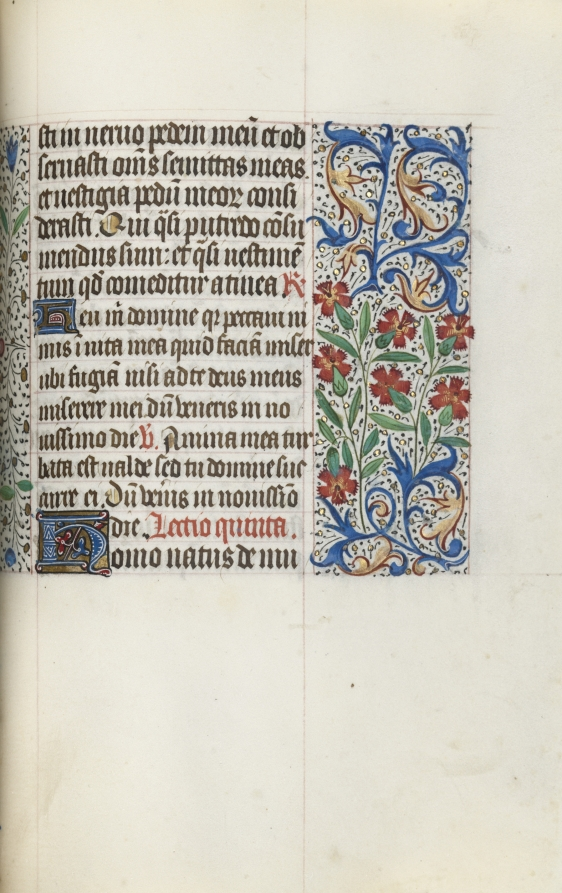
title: Book of Hours (Use of Rouen): fol. 123r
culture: France, Rouen, 15th century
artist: Master of the Geneva Latini (French, active Rouen, 1460–80)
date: c. 1470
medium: ink, tempera, and gold on vellum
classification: Bound Volume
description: In the late 1400s and early 1500s Rouen was an established and important center of book production. The city’s cathedral had a wealthy chapter that spent large sums of money to commission books and to maintain its extensive library. The stationers and booksellers would have likely been concentrated in or near the cathedral precinct. This artist, named after a manuscript now in Geneva, was Rouen’s principal illuminator during the second half of the 1400s.